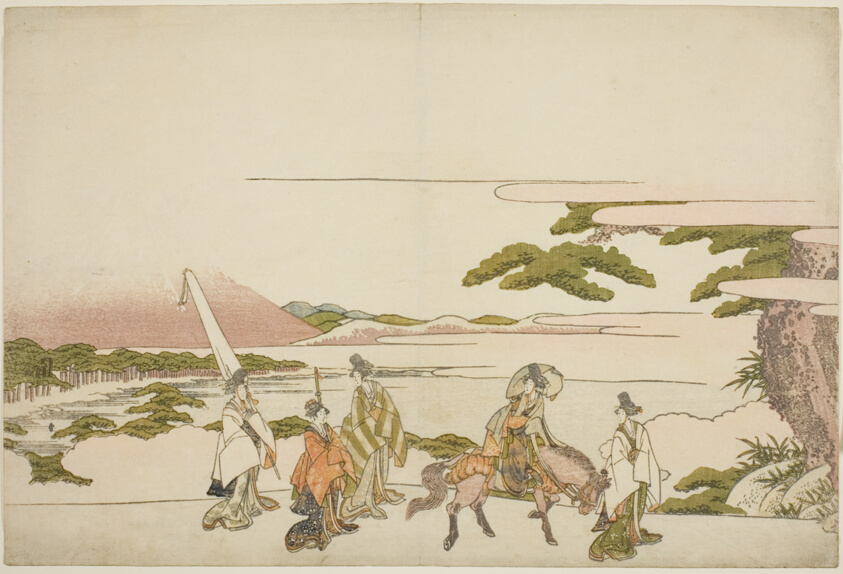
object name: Print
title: Parody of Ariwara no Narihira's eastern journey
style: Japanese (culture or style)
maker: Attributed to Katsushika Hokusai 葛飾 北斎; Japanese, 1760-1849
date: c. 1803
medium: Color woodblock print; oban, surimono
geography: Japan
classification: woodblock print; print; asian art